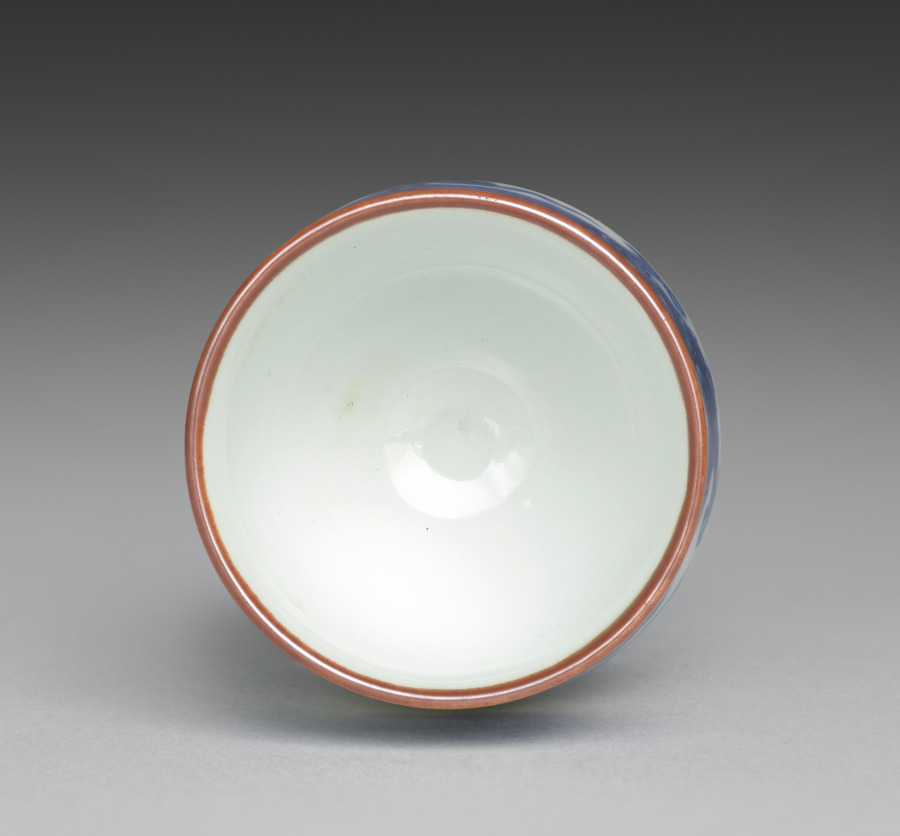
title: Cup from Sake Cups with Dragons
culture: Japan, Meiji period (1868–1912)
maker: Seifū Yohei III (Japanese, 1851–1914)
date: c. 1893–1914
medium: One from a set of six sake cups; porcelain with underglaze blue and iron oxide rims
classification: Ceramic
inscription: 大日本清風造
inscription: 清風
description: Each of these sake cups pictures two backward-looking dragons. The highly stylized creatures resemble jade carvings.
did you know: Seifū Yohei III was inspired by the Chinese mythical animals that were common on porcelain objects made at Jingdezhen in China during the Ming dynasty (1368–1644) and then exported around the world.